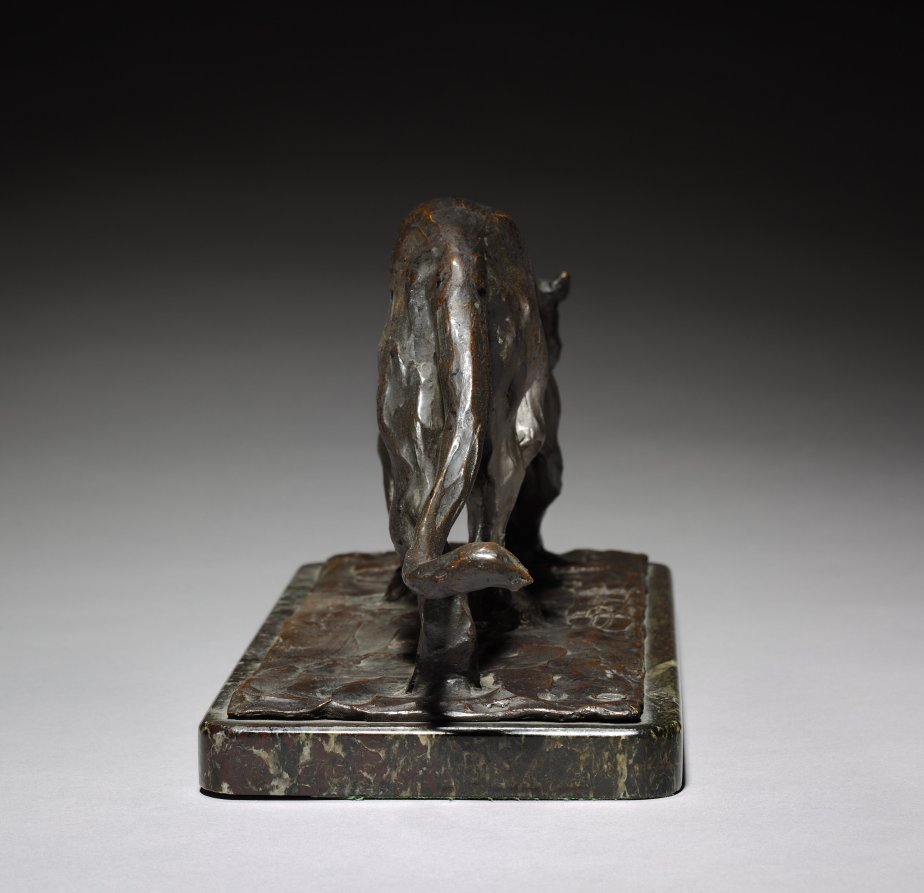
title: Walking Panther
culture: Italy, active in France, early 20th Century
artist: Rembrandt Bugatti (Italian, 1884–1916)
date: 1903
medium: bronze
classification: Sculpture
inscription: signed: R. Bugatti, stamped A. A. Hebrard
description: Panthers were among the first wild animals depicted by Rembrandt Bugatti after his encounter with them in the French national zoo, at the Jardin des Plantes in Paris.